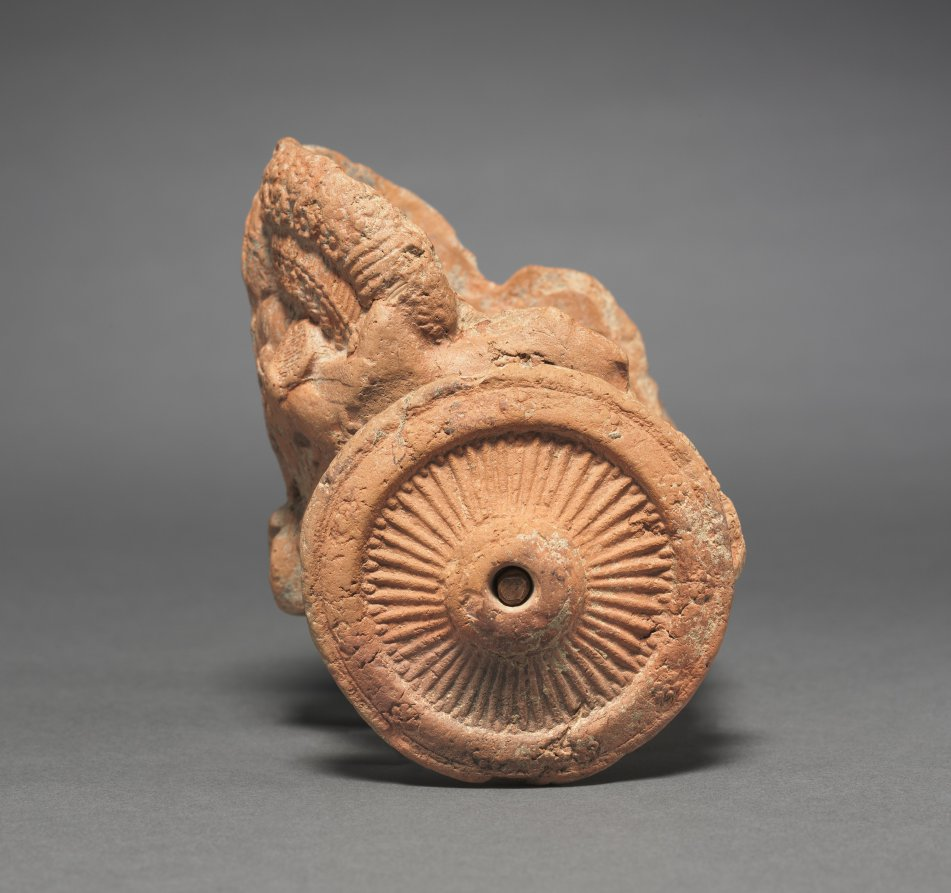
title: Model Chariot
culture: India, Shunga period (185–78 BCE)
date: 200s–100s BCE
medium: terracotta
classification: Sculpture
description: This terracotta chariot may have held a figurine of a hero or divinity for use on a domestic altar or as a toy. The two-wheeled conveyance is decorated with rows of flowers and bells. A charioteer and two horses, now indistinct, appear to have been carved onto the front.